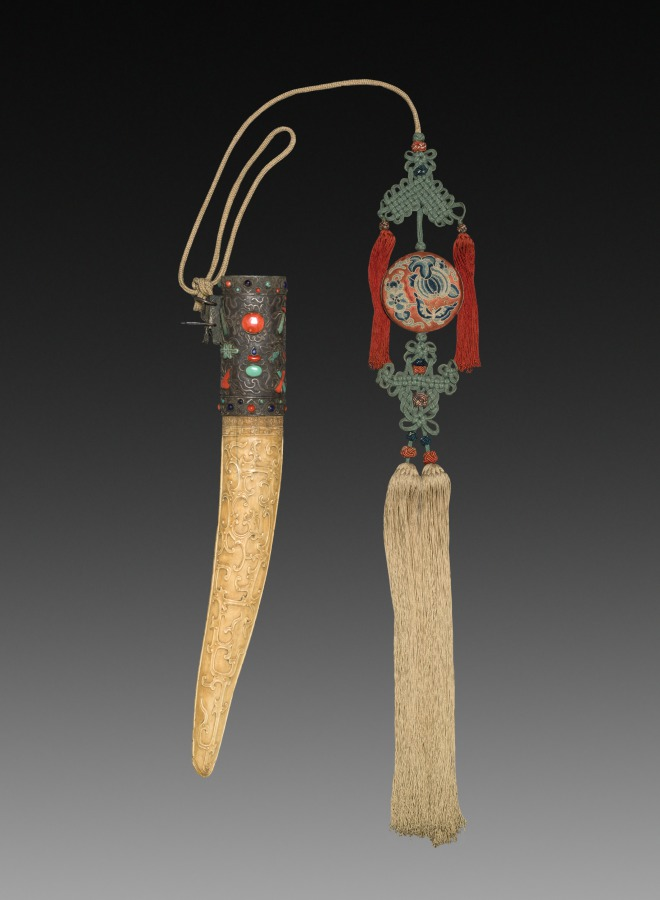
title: Sheath for Sword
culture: China, Qing dynasty (1644-1911)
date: 1800–1911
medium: ivory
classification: Arms and Armor